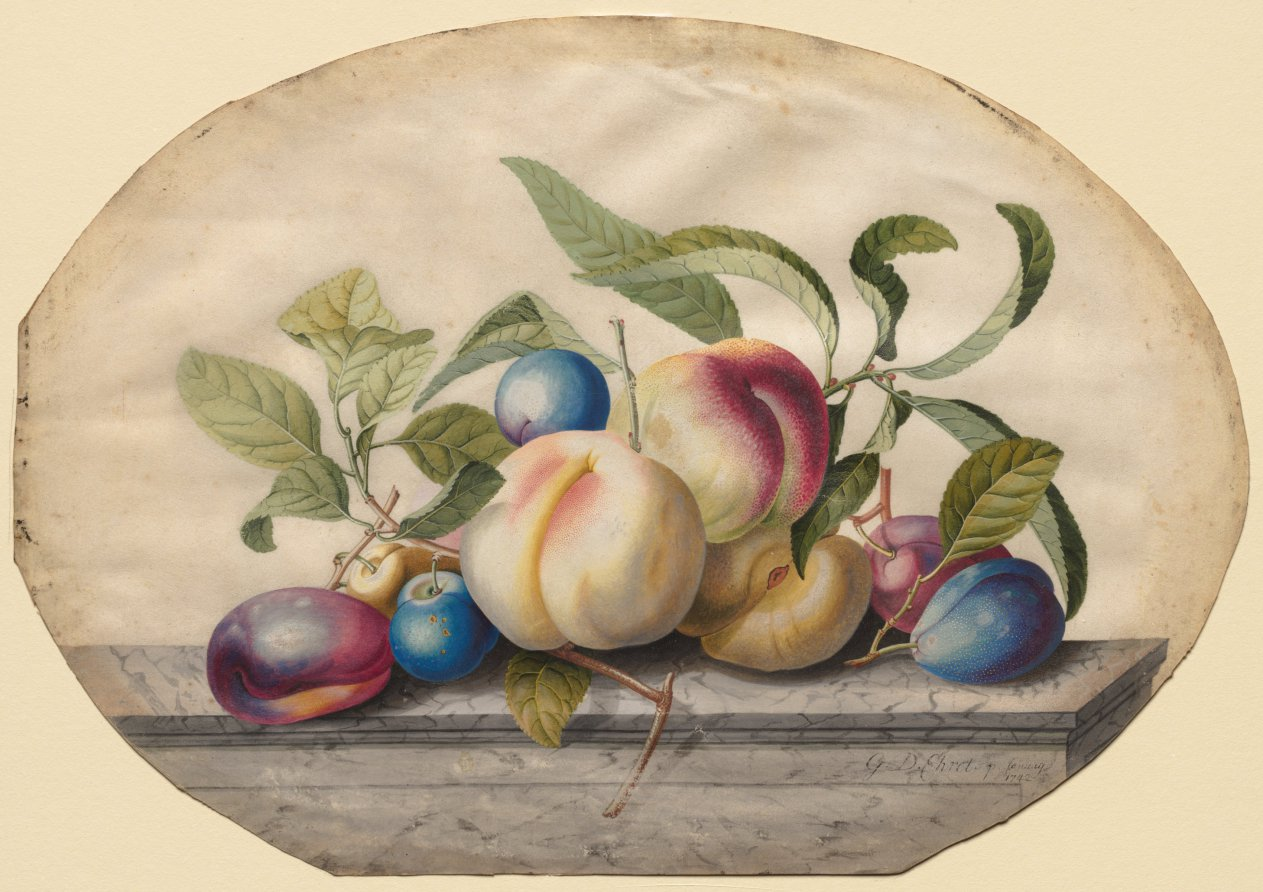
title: Fruit Arrangement: Peaches and Plumbs on a Slab of Marble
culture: Germany, 18th century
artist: Georg Dionysius Ehret (German, 1708–1770)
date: 1742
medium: watercolor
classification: Drawing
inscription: Dated January 1742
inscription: Signed lower right